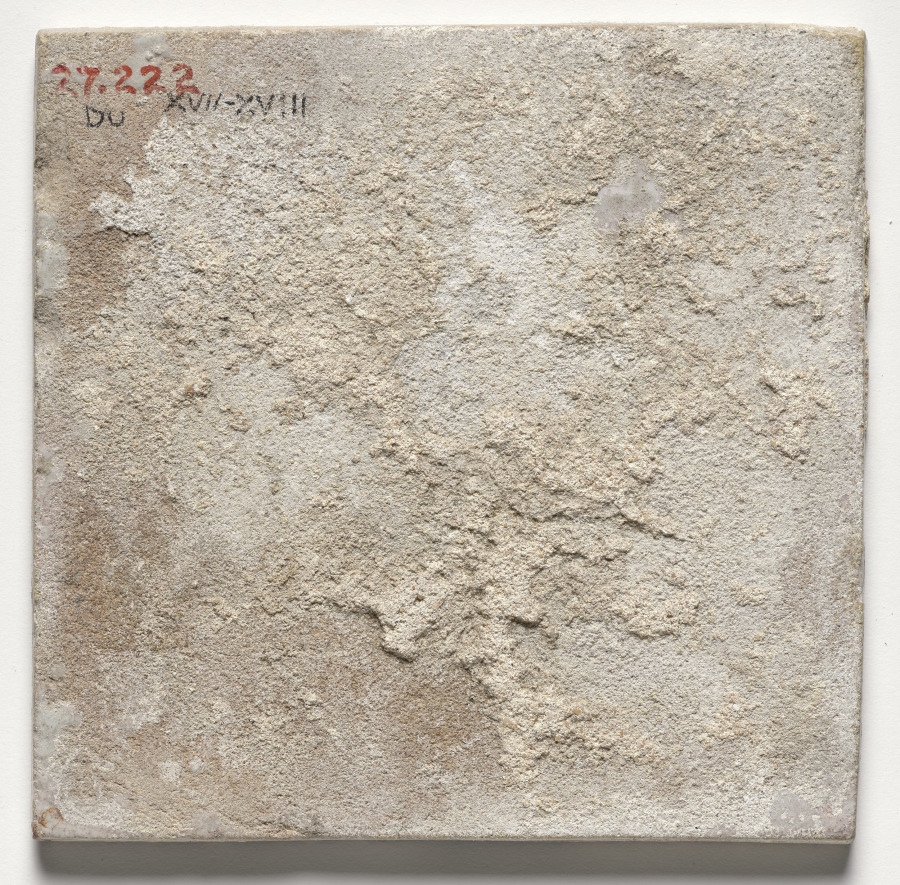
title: Tile- New Testament Scene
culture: Netherlands, Holland, Delft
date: c 1600s- 1700s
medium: glazed ceramic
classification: Ceramic